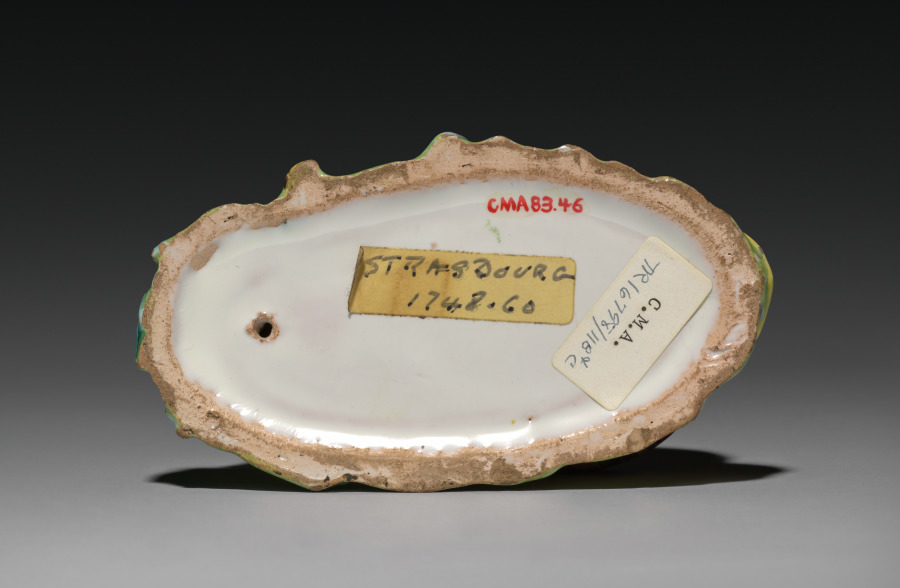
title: Box in the Form of a Snail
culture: France, 18th century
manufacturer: Strasbourg Factory (France)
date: c. 1750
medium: faience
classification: Ceramic